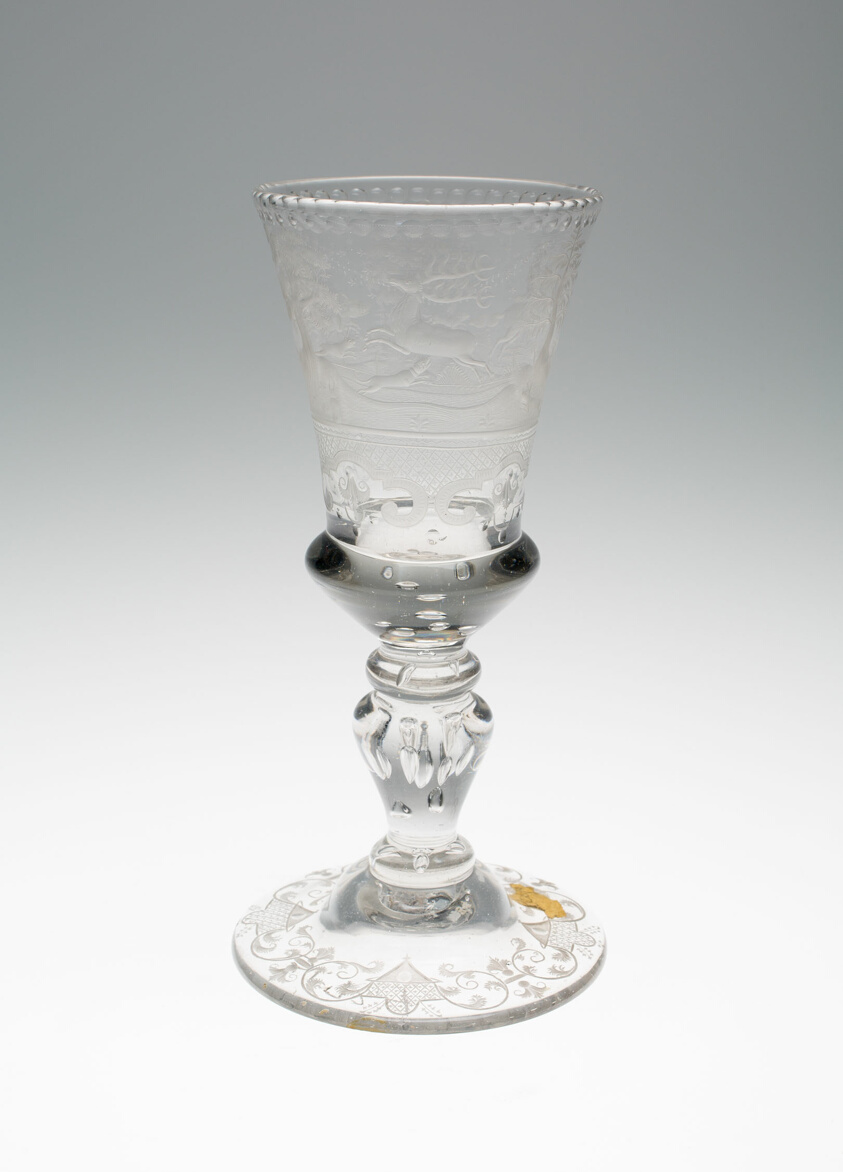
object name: Glass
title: Goblet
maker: England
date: 18th century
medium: Glass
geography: England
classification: drinking vessel; glass; european decorative arts